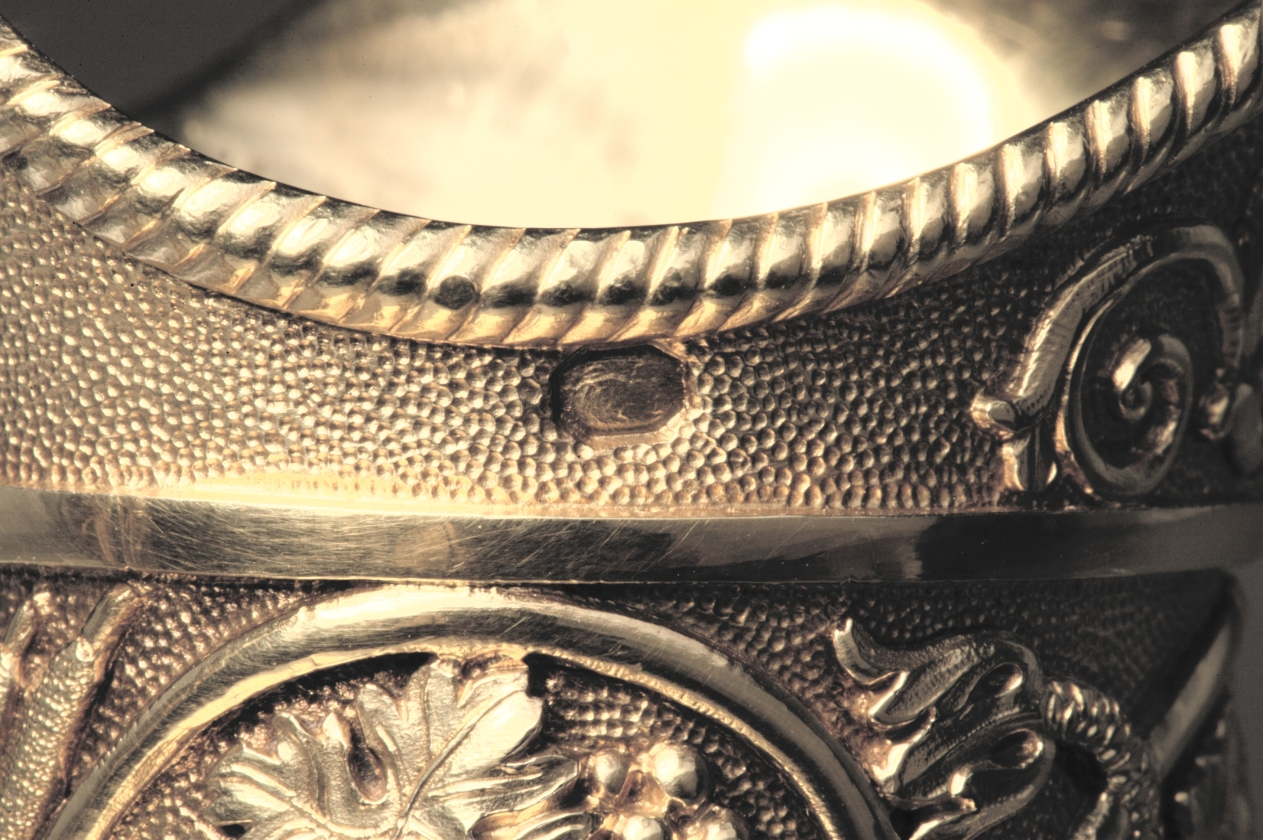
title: Ewer (aiguière)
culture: France, 19th century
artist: Jean Baptiste Claude Odiot (French)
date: c. 1817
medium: silver gilt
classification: Silver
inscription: [Excise mark for medium-sized work, Paris, 1809-1819, on edge of base]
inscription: [Two maker's marks of Jean-Baptiste-Claude Odiot after the Revolution, inside foot]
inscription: [Official assay mark for first standard silver, Paris, 1809-1819, near exterior upper rim]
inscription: [Applied coat of arms of the count Alfred de la Chapelle, Seigneur of Morton and Beaulieu, Périgord “accolé” with an alternate version of de la Chapelle, exterior of foot]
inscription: [Struck twice, interior foot]: "ODIOT"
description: Jean-Baptiste-Claude Odiot’s reputation stretched internationally. Commissioned by Russian count Nikolei Demidoff, this ewer was one part of an extensive silver dinner service. Decorated with motifs of classical antiquity, this object’s Greco-Roman silhouette, grape vine frieze, raised mythological figures, and sinuous swan’s neck handle were likely inspired by the designs of Charles Percier and Pierre-François Fontaine, architects of Napoleon I.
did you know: The coat of arms on the foot of this ewer belongs to the count Alfred de la Chapelle who owned this silver dinner service during the second half of the 19th century.